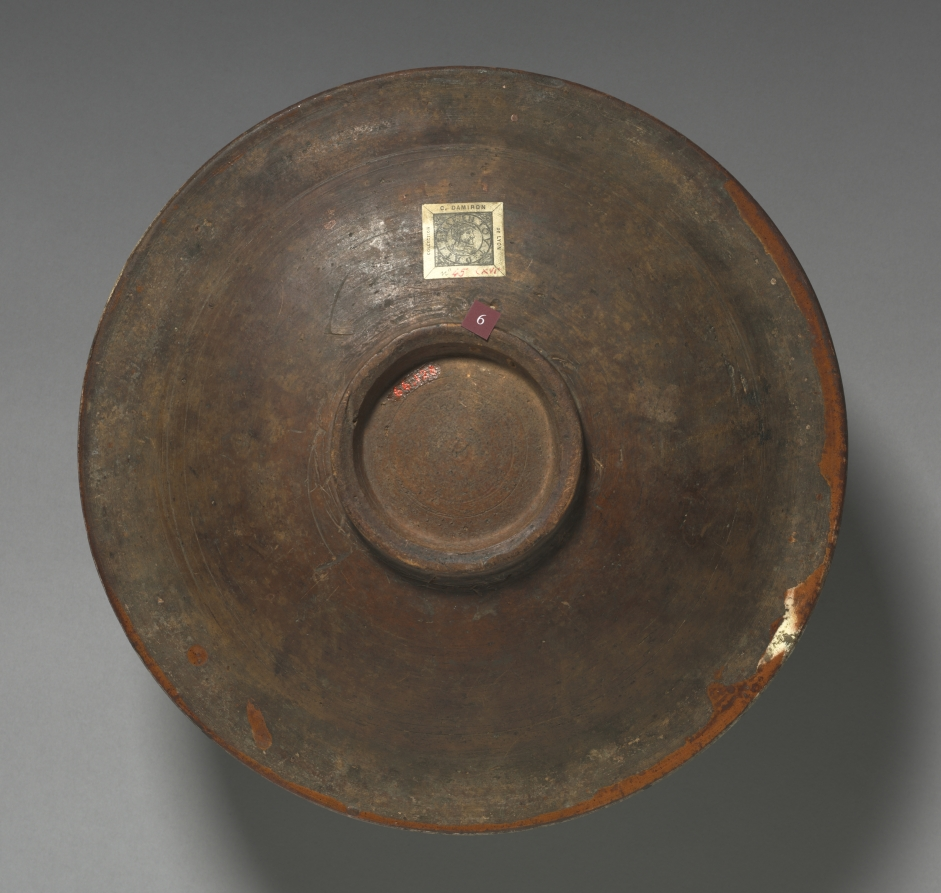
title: Plate with a Portrait of a Gentleman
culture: Italy, Ferrara, early 16th Century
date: c. 1500–1510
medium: red earthenware, incised slipware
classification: Ceramic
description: This plate is an example of incised slipware—a technique in which clay was coated with a pale-colored slip and decorated by scratching away part of the slip to reveal the darker body beneath. Although produced in the same kilns as maiolica, slipware did not require the additional expense of importing tin.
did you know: Incised slipware is an ancient technique of decorating ceramics that dates back to the Tang dynasty in China (618-907).